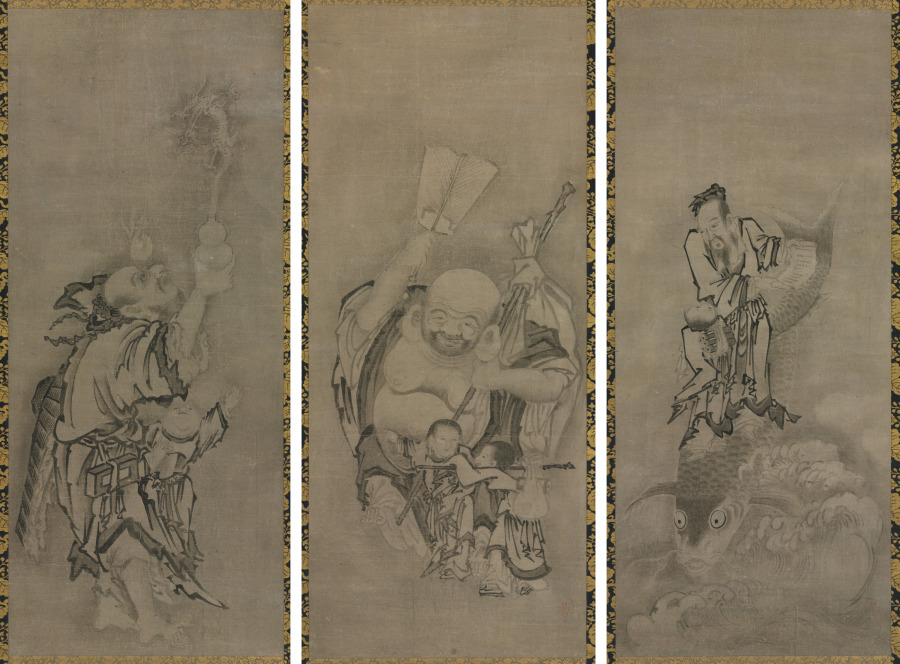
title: Hotei with Daoist Immortals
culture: Japan, Edo period (1615–1868)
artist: Kyūseki Tomonobu (Japanese, 1653–1721)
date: late 1600s–early 1700s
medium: triptych of hanging scrolls: ink on paper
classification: Painting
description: Hotei was a Chan (Zen) monk living in China during the 900s who became a legendary figure in Japan in the 1300s. At that time a popular cult praising him sprang up, extending beyond Zen to other religious communities. This rare triptych embraces a central Zen icon with flanking Daoist images, thereby suggesting the compatibility, rather than the exclusivity, of these two creeds. Hotei also enjoys popularity in Japan as a kind of folk figure, which explains his mirthful expression in Japanese paintings. The Daoist figures in contrast appear eccentric and foreign, in keeping with Daoist lore. When these paintings came to the museum their appearance was compromised by poor quality textile mountings, and cracked paper surfaces needing restoration. Following the cleaning of the paper surfaces and the repair of the lifting surface areas, each scroll was completely remounted. No inpainting was done, thereby preserving the original ink values and brushstrokes.